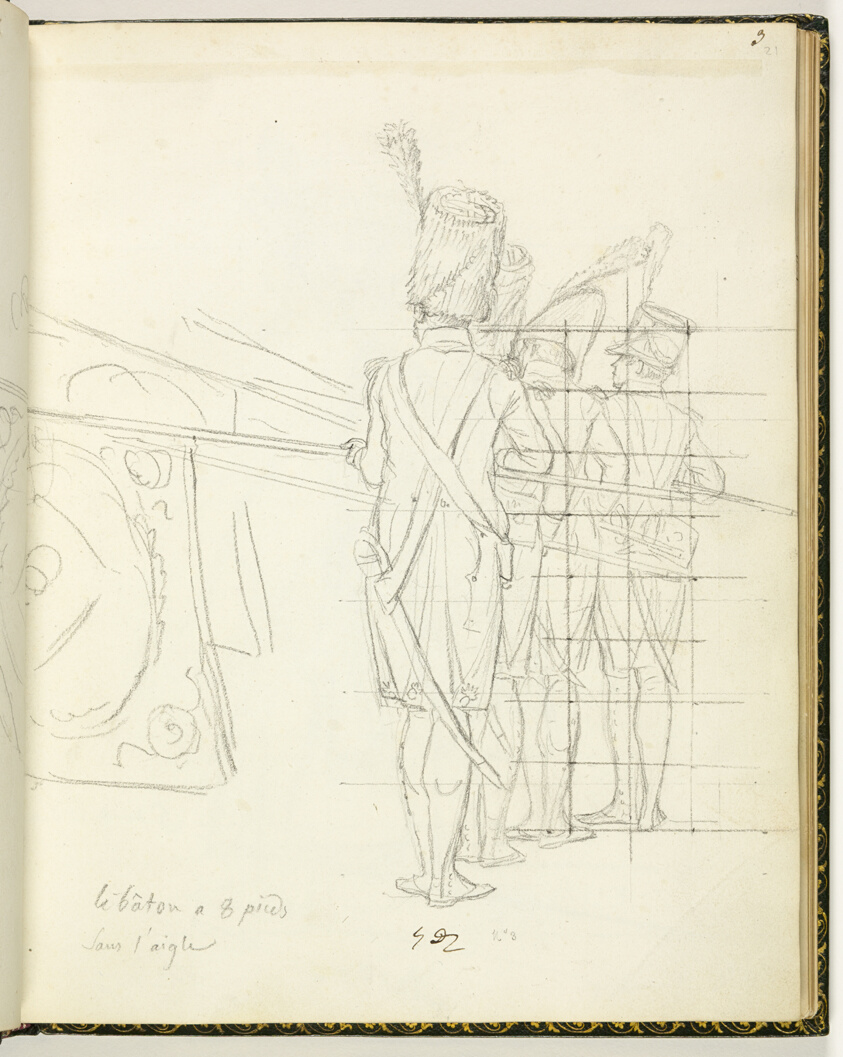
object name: Drawing and Watercolor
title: Sketchbook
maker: Jacques-Louis David; French, 1748-1825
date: 1809–10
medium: Graphite, black chalk, black crayon, and pen and brown ink drawings on wove paper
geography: France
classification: sketchbook; chalk; prints and drawing; paper